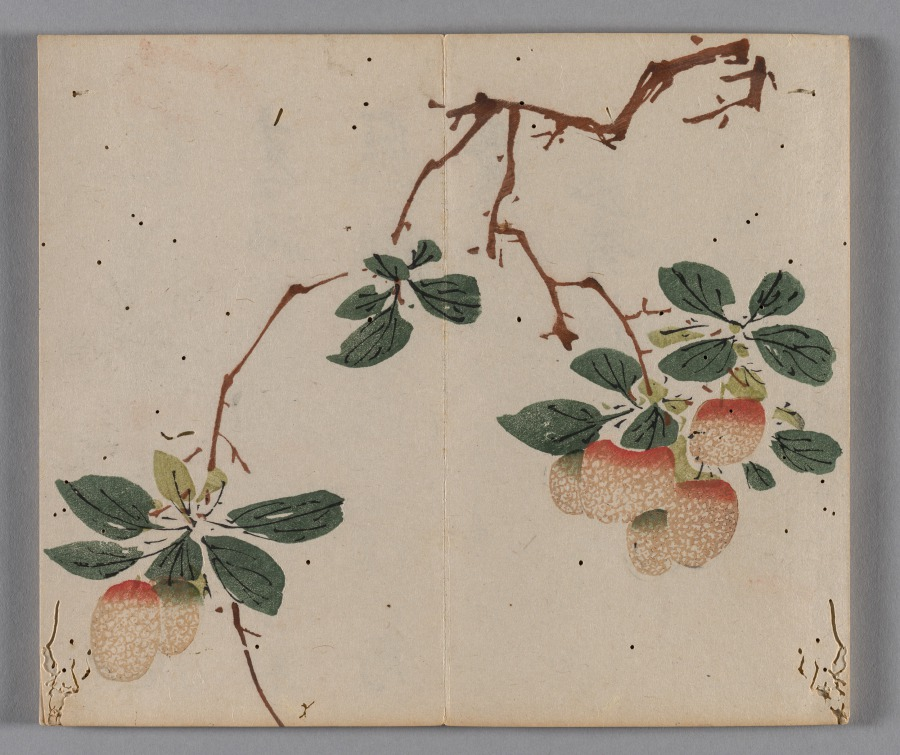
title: Ten Bamboo Studio Painting and Calligraphy Handbook (Shizhuzhai shuhua pu): Fruit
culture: China, Qing dynasty (1644-1911)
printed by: Hu Zhengyan (Chinese, c. 1584–1674)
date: 1633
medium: Woodblock-printed book; ink and colors on paper; first edition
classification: Print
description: Color printing reached a level of perfection in the early 1600s, as seen in this Ten Bamboo Studio Collection of Calligraphy and Painting and the Mustard Seed Garden Manual of Painting (printed 1679 and 1701). The painterly quality, precision in registering (aligning) the woodblocks, and harmonious colors made them the most successful color print editions in Chinese history. Both editions were printed and compiled in Nanjing, spread nationwide, and had a great impact on the arts in Japan and Korea.